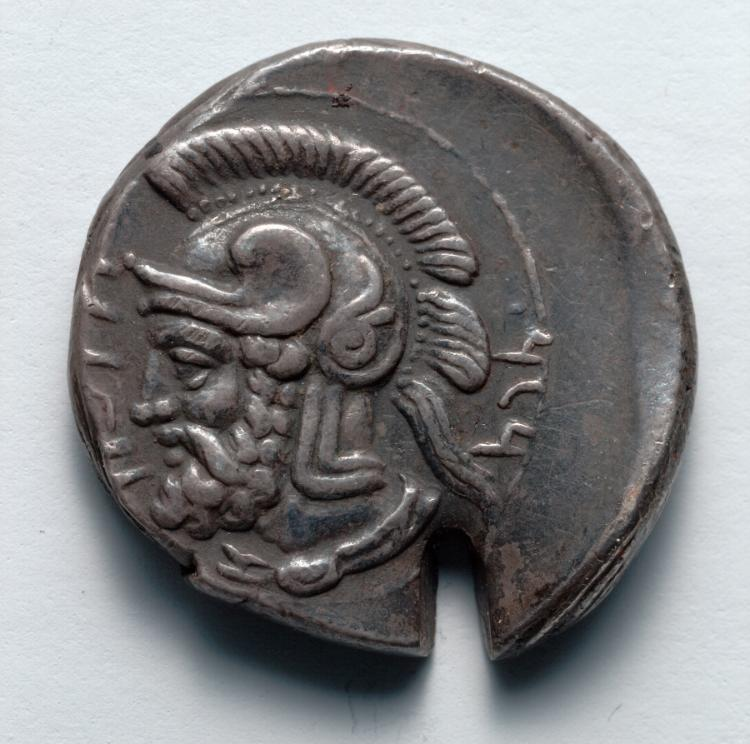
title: Stater: Head of Pharnabazus, Helmeted, within Circle (reverse)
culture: Iran, Achaemenid (550–330 BCE), minted at Tarsos (Kilikia)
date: 379–374 BCE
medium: silver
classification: Coins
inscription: 𐡊𐡋𐡊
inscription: [𐡐𐡓𐡍𐡁𐡆𐡅]